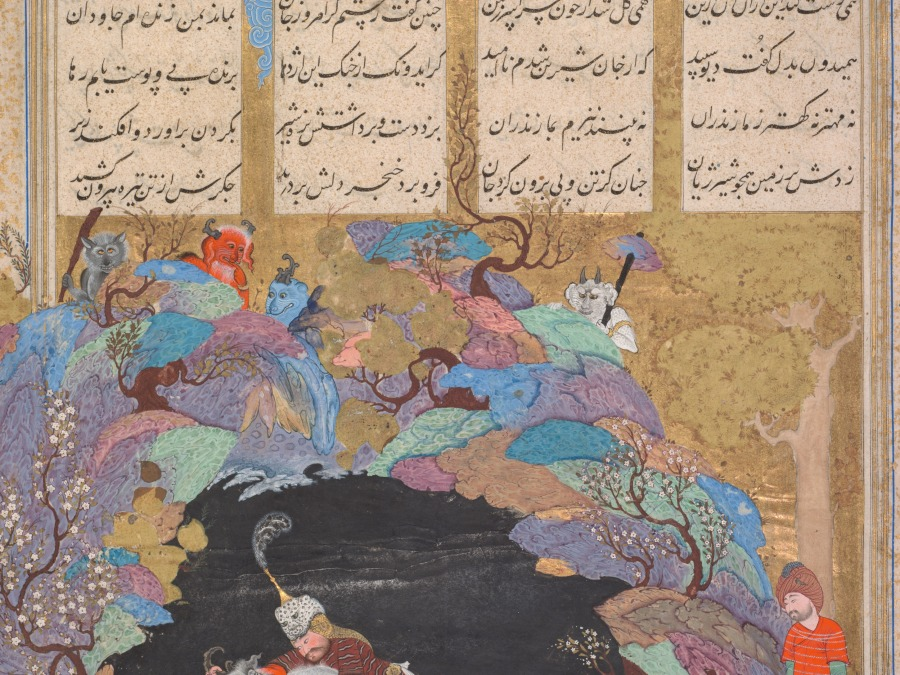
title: Rustam's seventh course: He kills the White Div, folio 124 from a Shah-nama (Book of Kings) of Firdausi (Persian, about 934–1020)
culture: Iran, Tabriz, Safavid period (1501-1722)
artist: attributed to Abd al-Vahhab (Persian, active about 1516)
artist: attributed to Mir Musavvir (Iranian, c. 1510–1555)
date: 1522–37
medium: Gum tempera, ink, gold, and silver on paper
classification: Manuscript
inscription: Script: Nasta'liq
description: The legendary hero Rustam brutally takes the demon chief’s liver blood, needed to cure his king of blindness. Paintings from the Shah-nama made for the Persian ruler Shah Tahmasp (reigned 1524–76) were acclaimed in their day for their brilliant coloring and refinement. Seven of the artists who contributed to this book moved to India to lead the new Mughal painting workshop in the 1550s. They introduced to the Indian artists a more complex color sensibility and preference for presenting faces in three-quarter view, as opposed to in profile.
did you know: Devils in the details: three peer into the White Div’s lair by the Caspian Sea.